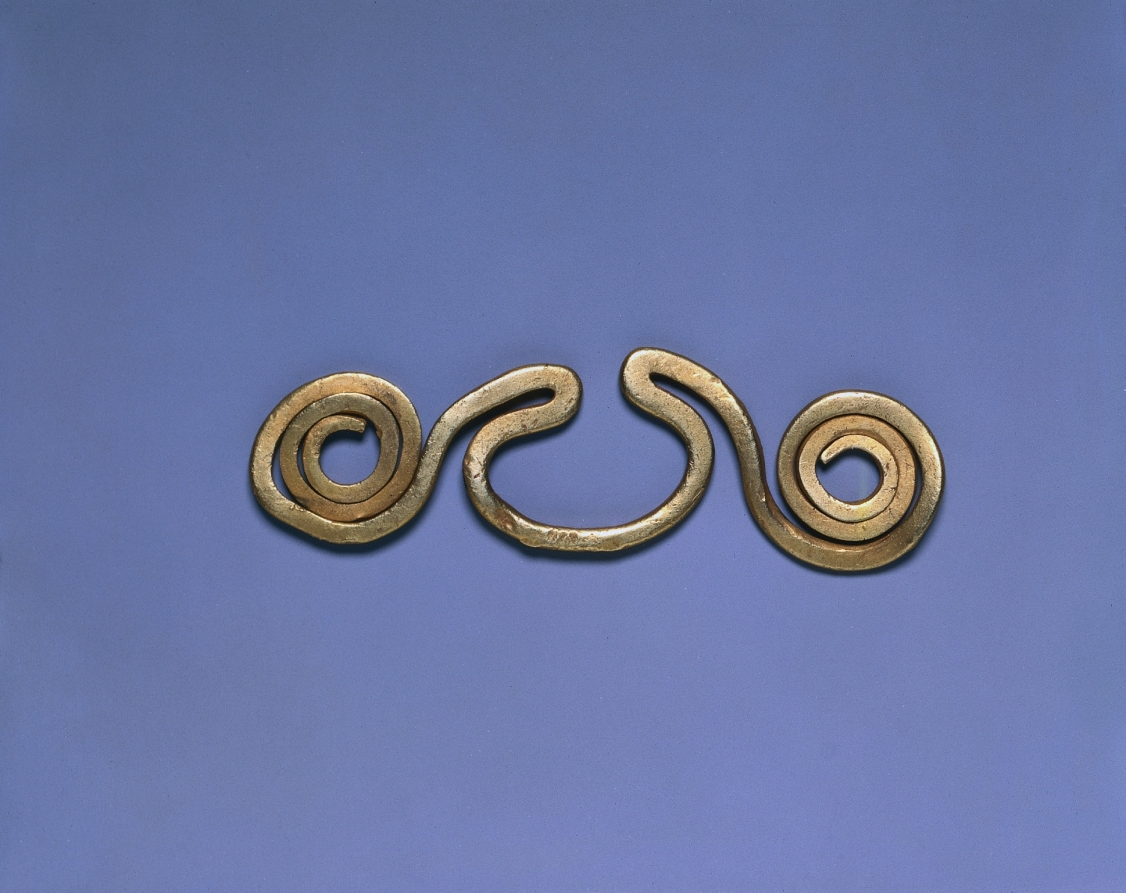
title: Nose Plug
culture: Ecuador, Esmeraldas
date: 200–1000 CE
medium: gold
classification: Metalwork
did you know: Working with gold dates back to at least 500 BC in Ecuador and Colombia.